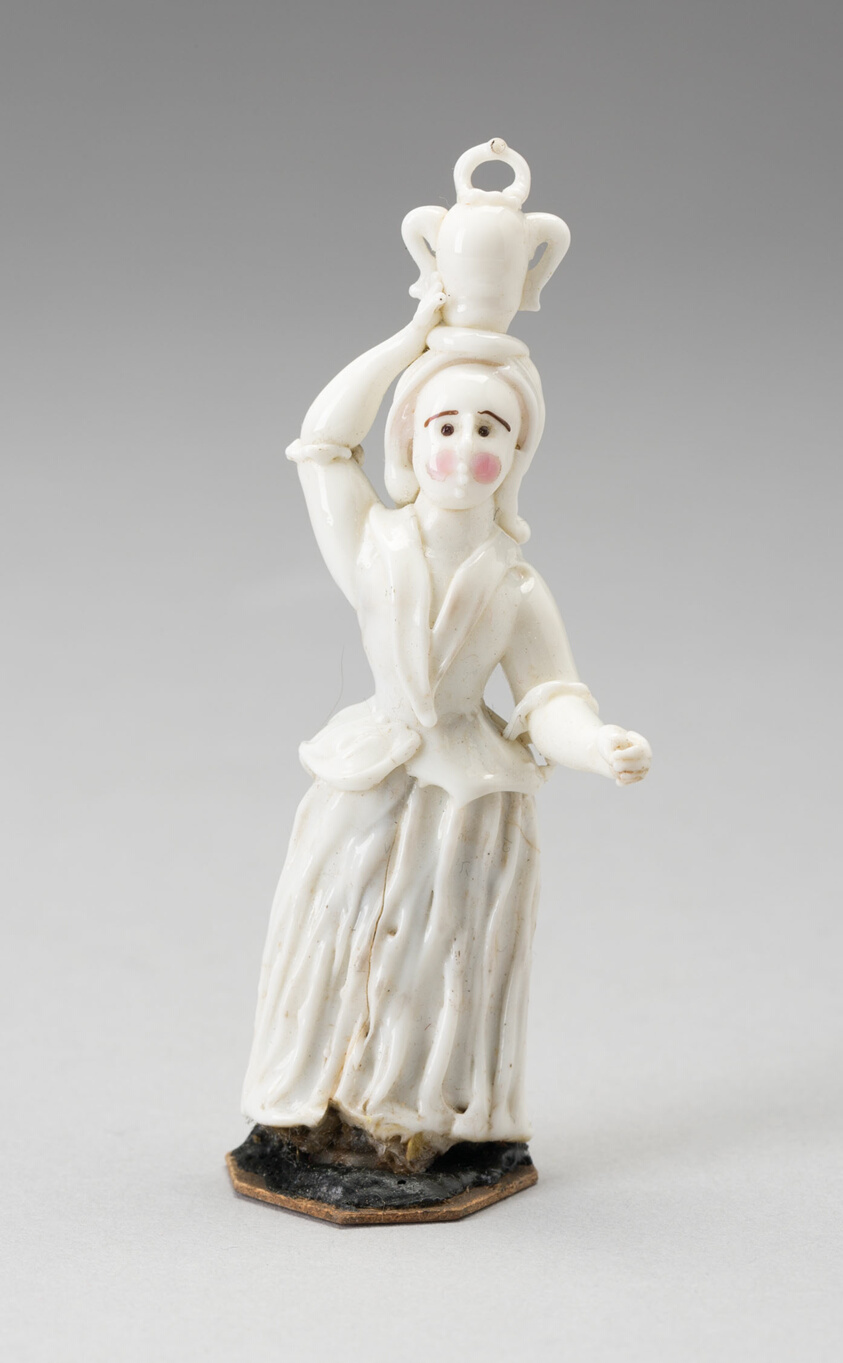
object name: Glass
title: Girl with Urn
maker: Nevers, France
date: Late 18th century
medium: Glass; lampwork (verre de Nevers), metal armature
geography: France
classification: glass; miniature; decorative object/ornament; european decorative arts